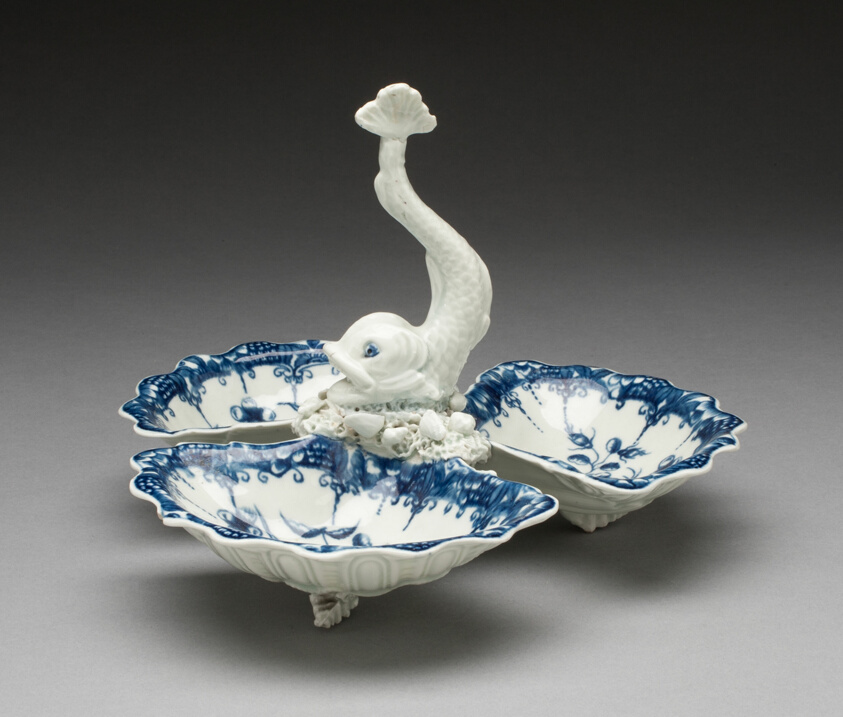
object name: Ceramics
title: Sweetmeat Stand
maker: Worcester Porcelain Factory (Warmstry House Period, 1751–1783); Worcester, England, founded 1751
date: c. 1770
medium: Soft-paste porcelain, underglaze blue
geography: Worcester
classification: porcelain; european decorative arts; ceramics